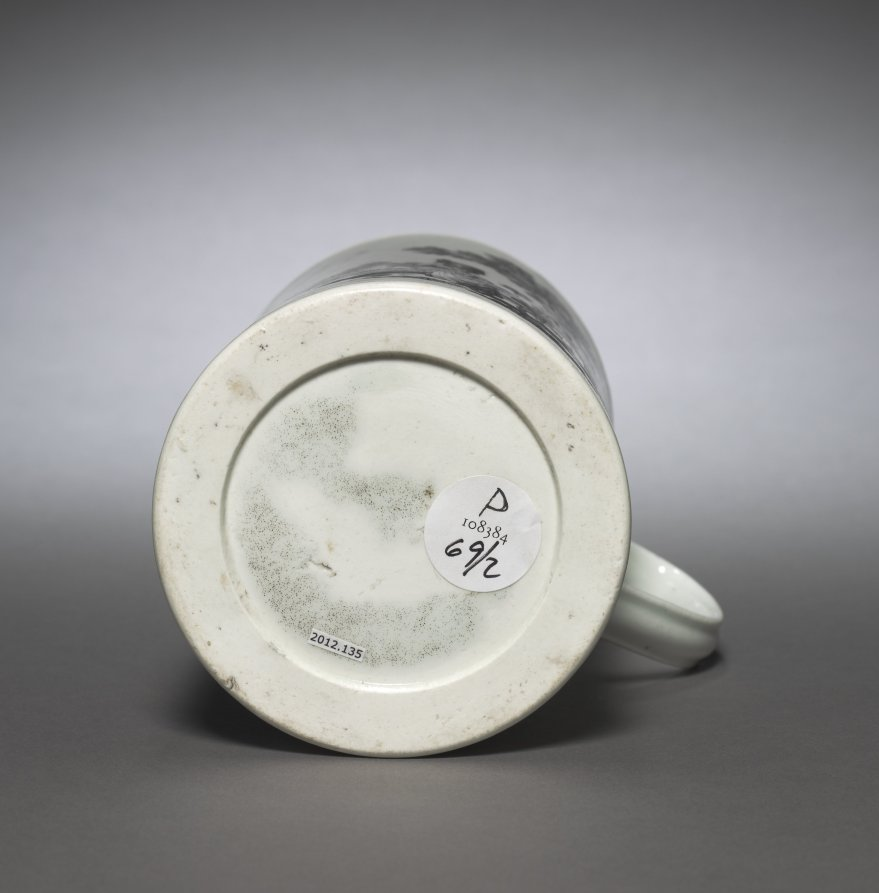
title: Cann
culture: England, 18th century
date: c. 1770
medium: ceramic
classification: Ceramic